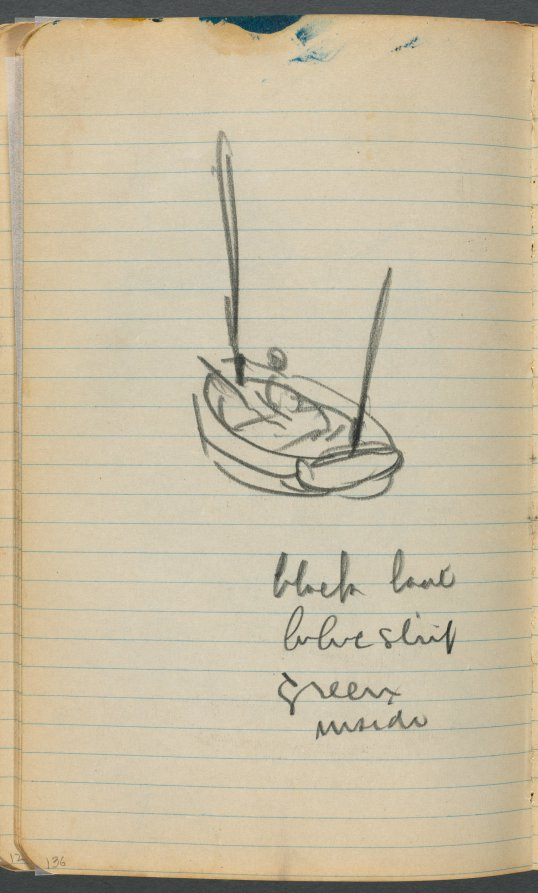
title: Sketchbook, page 136: Sailboat with notes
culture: America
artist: Maurice Prendergast (American, born Newfoundland [now Canada], 1858–1924)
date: 1905–10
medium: graphite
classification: Bound Volume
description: This sketchbook contains 69 pages of drawings, a diary largely devoted to the state of the artist's health, and a three-page discourse on the nature of genius and ideas.